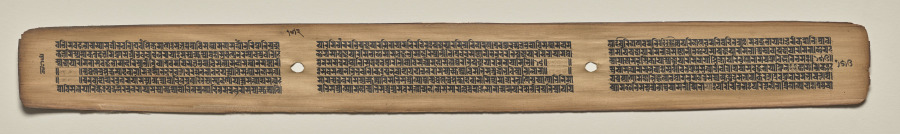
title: Text, Folio 152 (verso), from a Manuscript of the Perfection of Wisdom in Eight Thousand Lines (Ashtasahasrika Prajnaparamita-sutra)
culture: Eastern India, Bihar, Vikramashila Monastery. Painting: Nepal, Kathmandu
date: Sunday, September 14, 1119 (year 239 of the Newar Samvat in the month of Ashvina)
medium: gum tempera and ink on palm leaves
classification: Painting